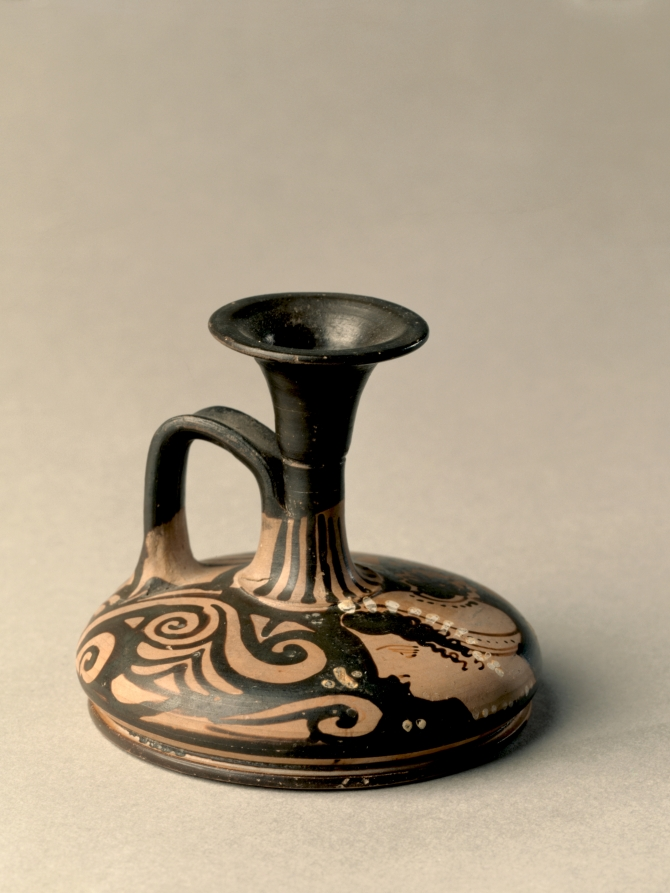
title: Red-Figure Squat Lekythos (Oil Vessel): Female Head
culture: South Italian, Apulian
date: 350–300 BCE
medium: ceramic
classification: Ceramic